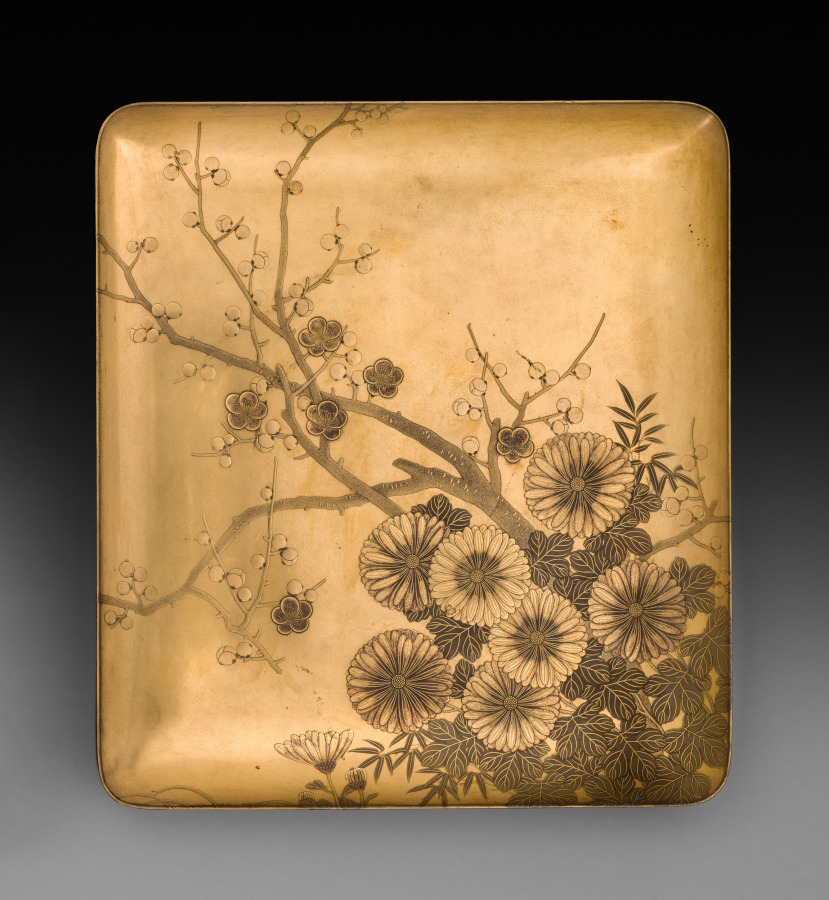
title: Lid of Writing Box (Suzuribako) with Chrysanthemum and Plum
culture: Japan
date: late 1800s-early 1900s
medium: Lacquer over wood with gold and silver sprinkled powder (maki-e)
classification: Lacquer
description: Both functional and elegant, this is a container for an ink stone, brushes, and ink from a set of writing tools that included a larger box for paper. Against a sleek gold lacquered ground, its artist has used restraint in sprinkled powder decoration (maki-e) to produce the design of cockscomb and harvested rice on the interior of the lid.